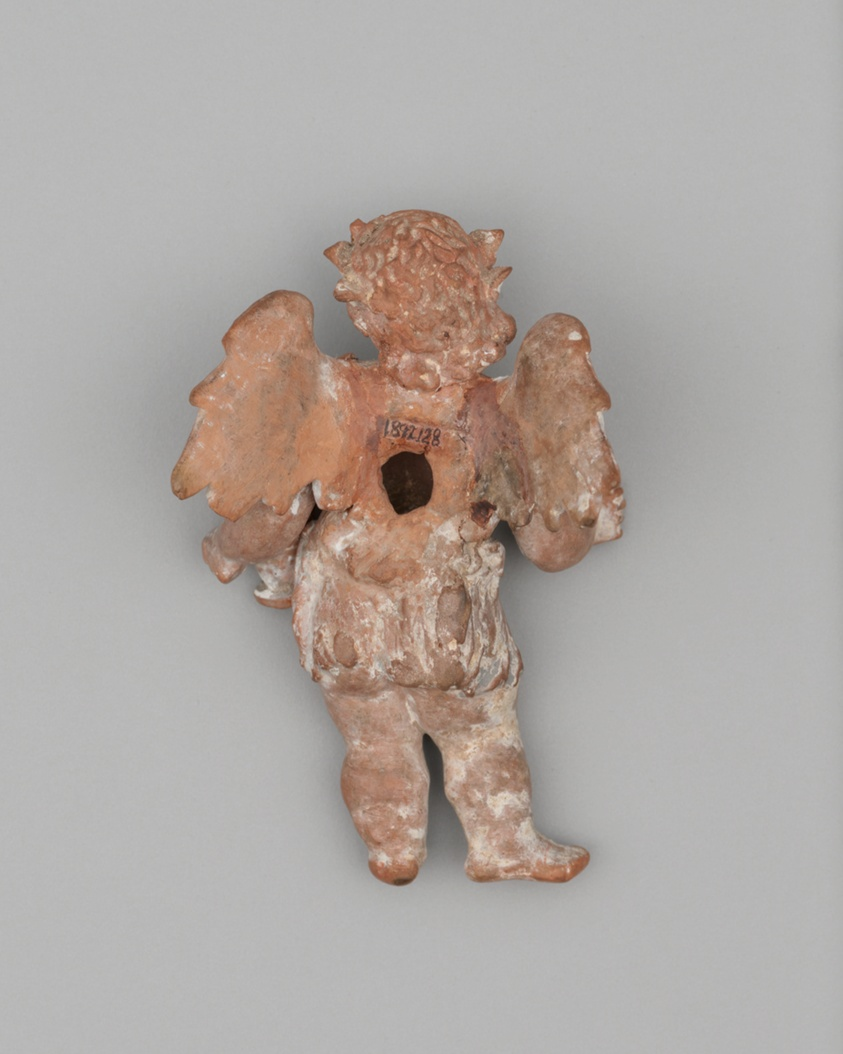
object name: Sculpture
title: Statuette of Eros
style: greek, ancient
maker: Greek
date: 3rd-2nd century BCE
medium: terracotta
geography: Greece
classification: earthenware; ceramics; sculpture; ancient art